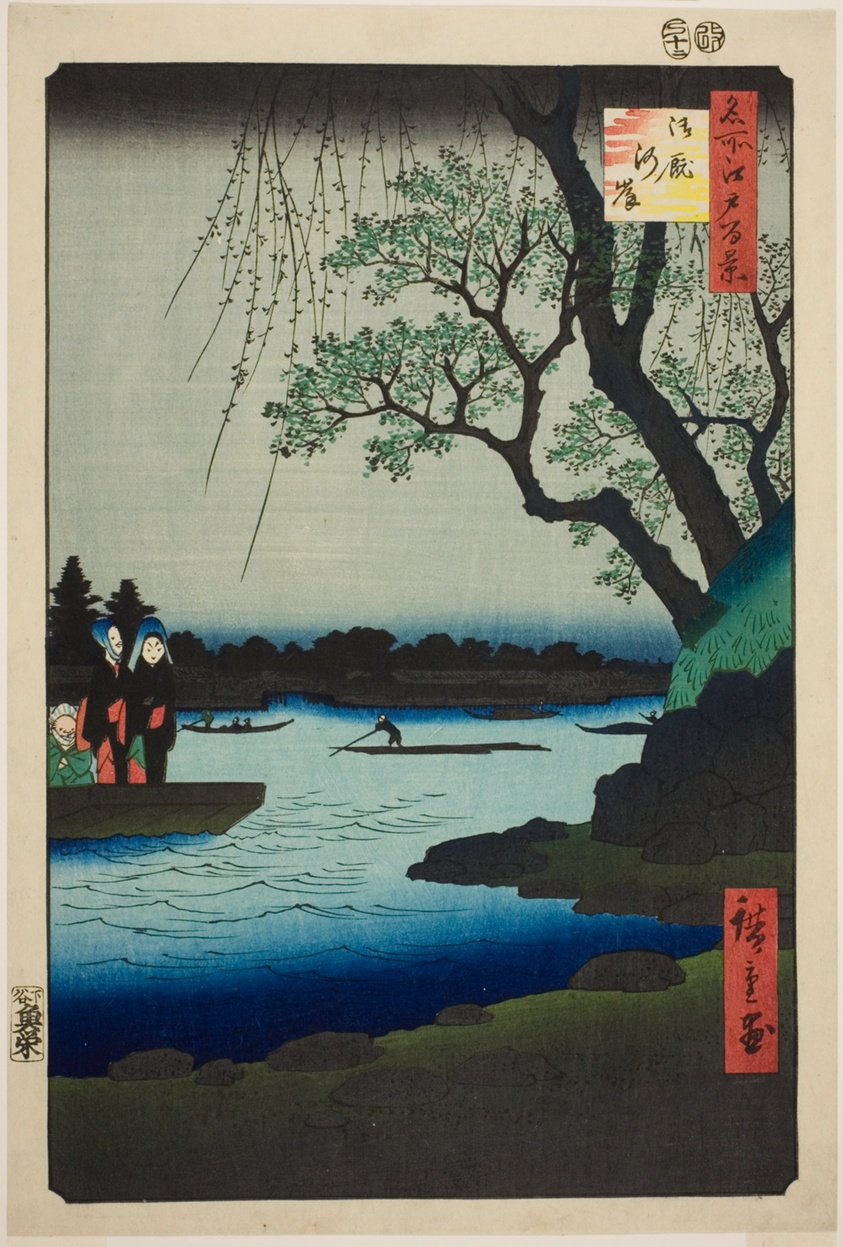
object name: Print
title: Oumayagashi, from the series "One Hundred Famous Views of Edo (Meisho Edo hyakkei)"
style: Japanese (culture or style)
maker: Utagawa Hiroshige 歌川 広重; Japanese, 1797-1858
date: 1857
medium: Color woodblock print; oban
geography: Japan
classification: woodblock print; print; asian art